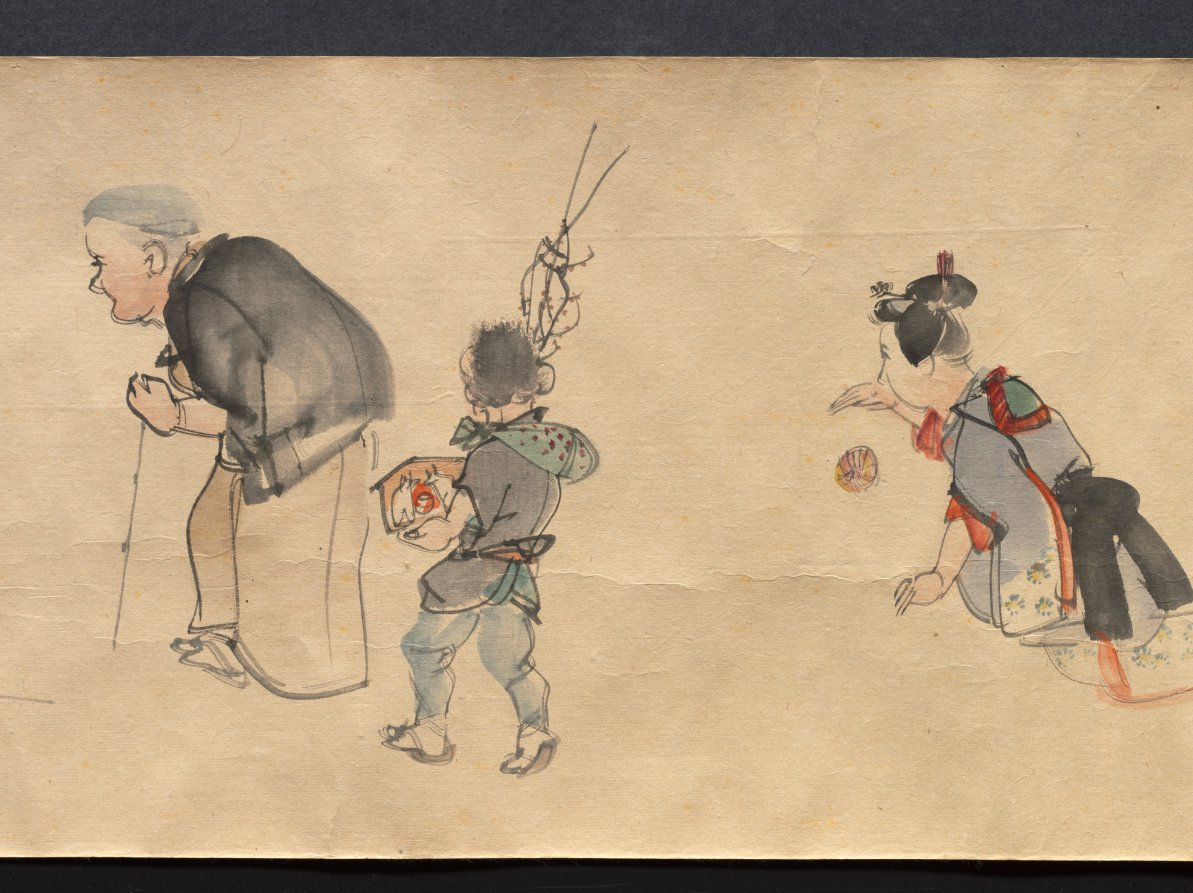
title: Festival Scenes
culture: Japan, Edo period (1615–1868)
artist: Suzuki Nanrei (Japanese, 1775–1844)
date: c. 1795–1844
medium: handscroll; ink and color on paper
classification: Painting